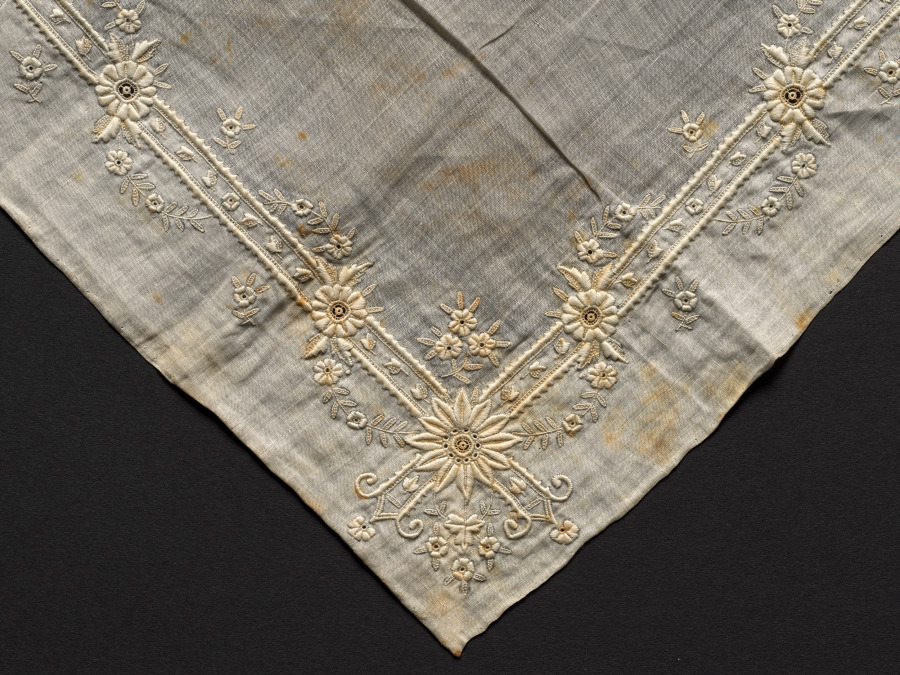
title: Handkerchief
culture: Switzerland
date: 1876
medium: Plain weave linen: embroidered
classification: Embroidery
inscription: initials in one corner: "K.H.I."